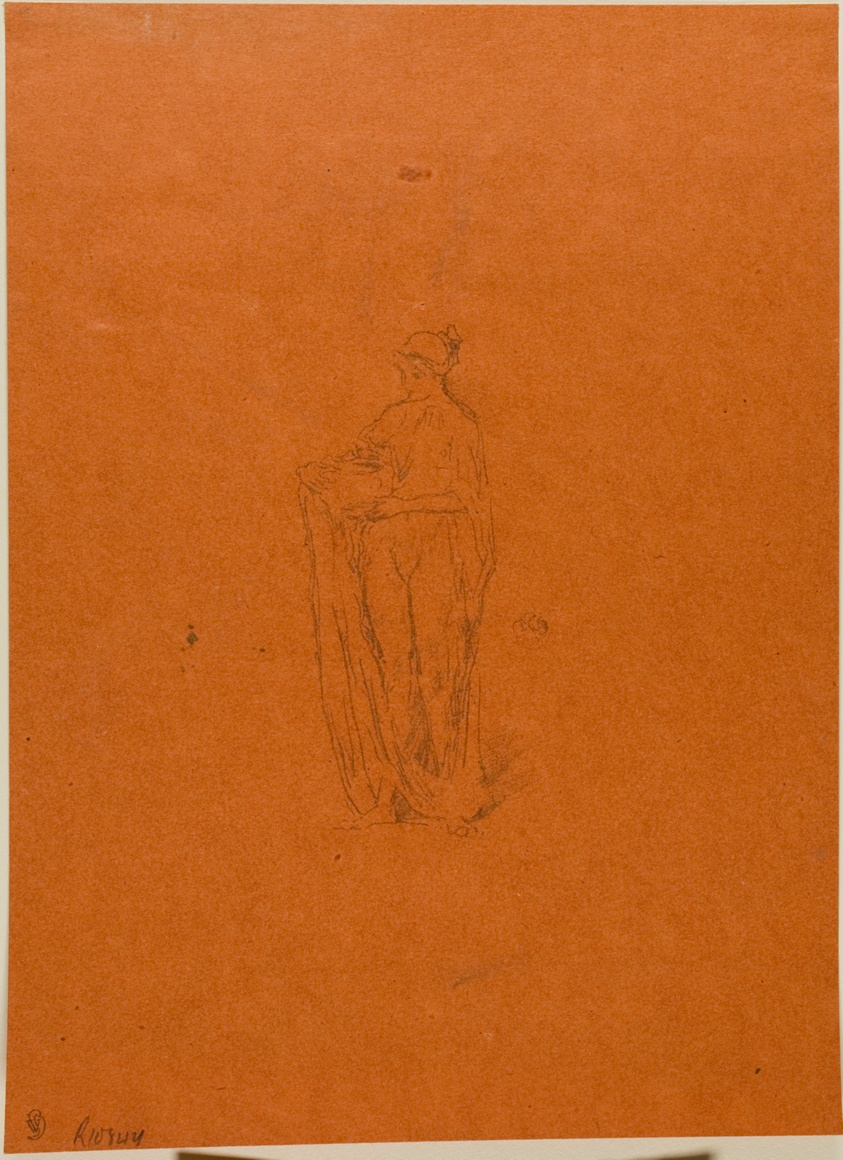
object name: Print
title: Girl with Bowl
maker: James McNeill Whistler (American, 1834-1903)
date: 1895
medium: Transfer lithograph in gray on orange wove Japanese vellum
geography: United States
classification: transfer lithograph; lithograph; print; prints and drawing